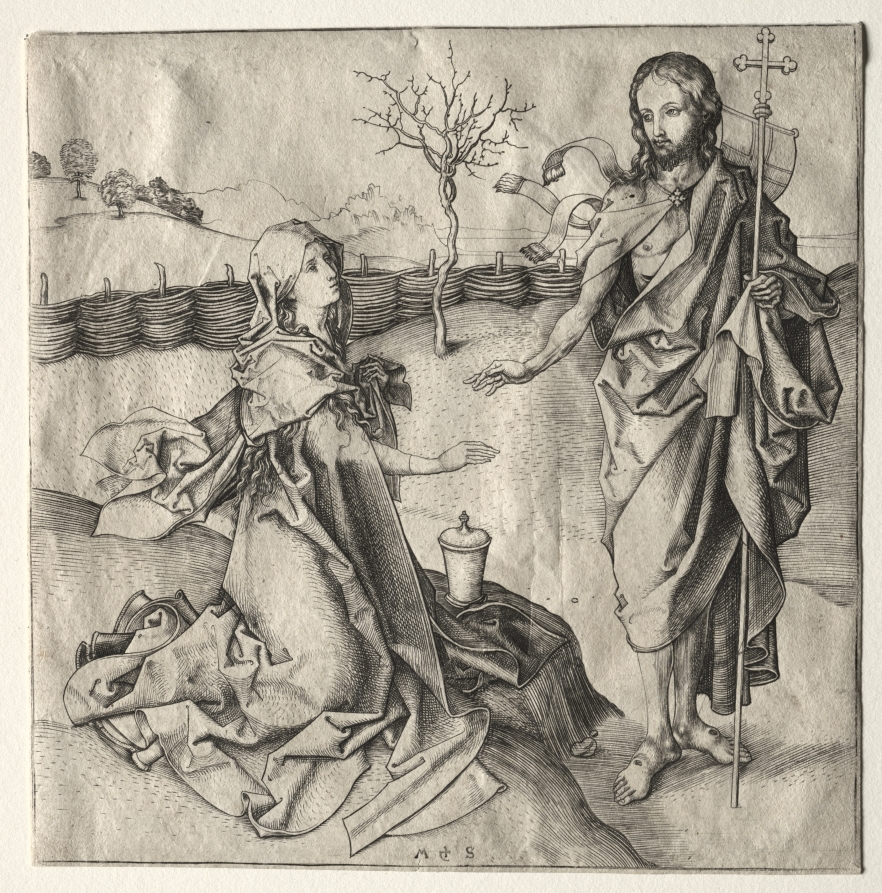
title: Christ Appearing to the Magdalen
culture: Germany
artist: Martin Schongauer (German, c. 1450–1491)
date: 1480–90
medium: engraving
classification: Print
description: According to the Gospel of John, right after his resurrection, Christ appeared to Mary Magdalene, who had come to anoint his body at his tomb. At first, she mistook Christ for a gardener. When he revealed himself, he said to Magdalene, "Noli me tangere" (Touch me not) and invited her to inform the apostles that he was ascending to his Father. Schongauer conveys the emotion and surprise of the Magdalen by showing her drapery flying behind her in the wind.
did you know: The fence shown in this print is called wattle fencing, a type known since antiquity and used primarily to contain livestock during the late Middle Ages.